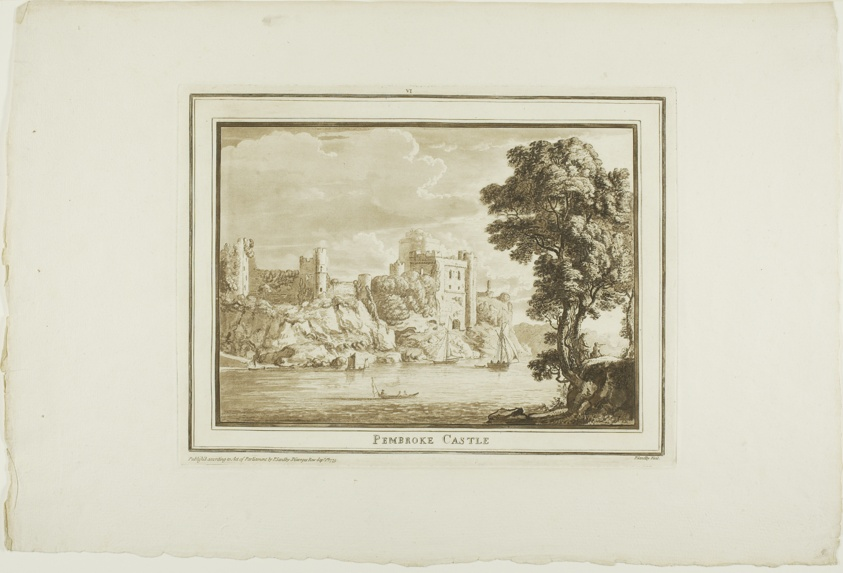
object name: Print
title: Pembroke Castle, plate six from Twelve Views in South Wales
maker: Paul Sandby (English, 1731-1809)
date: 1775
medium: Aquatint with etching on ivory laid paper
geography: England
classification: aquatint; print; prints and drawing